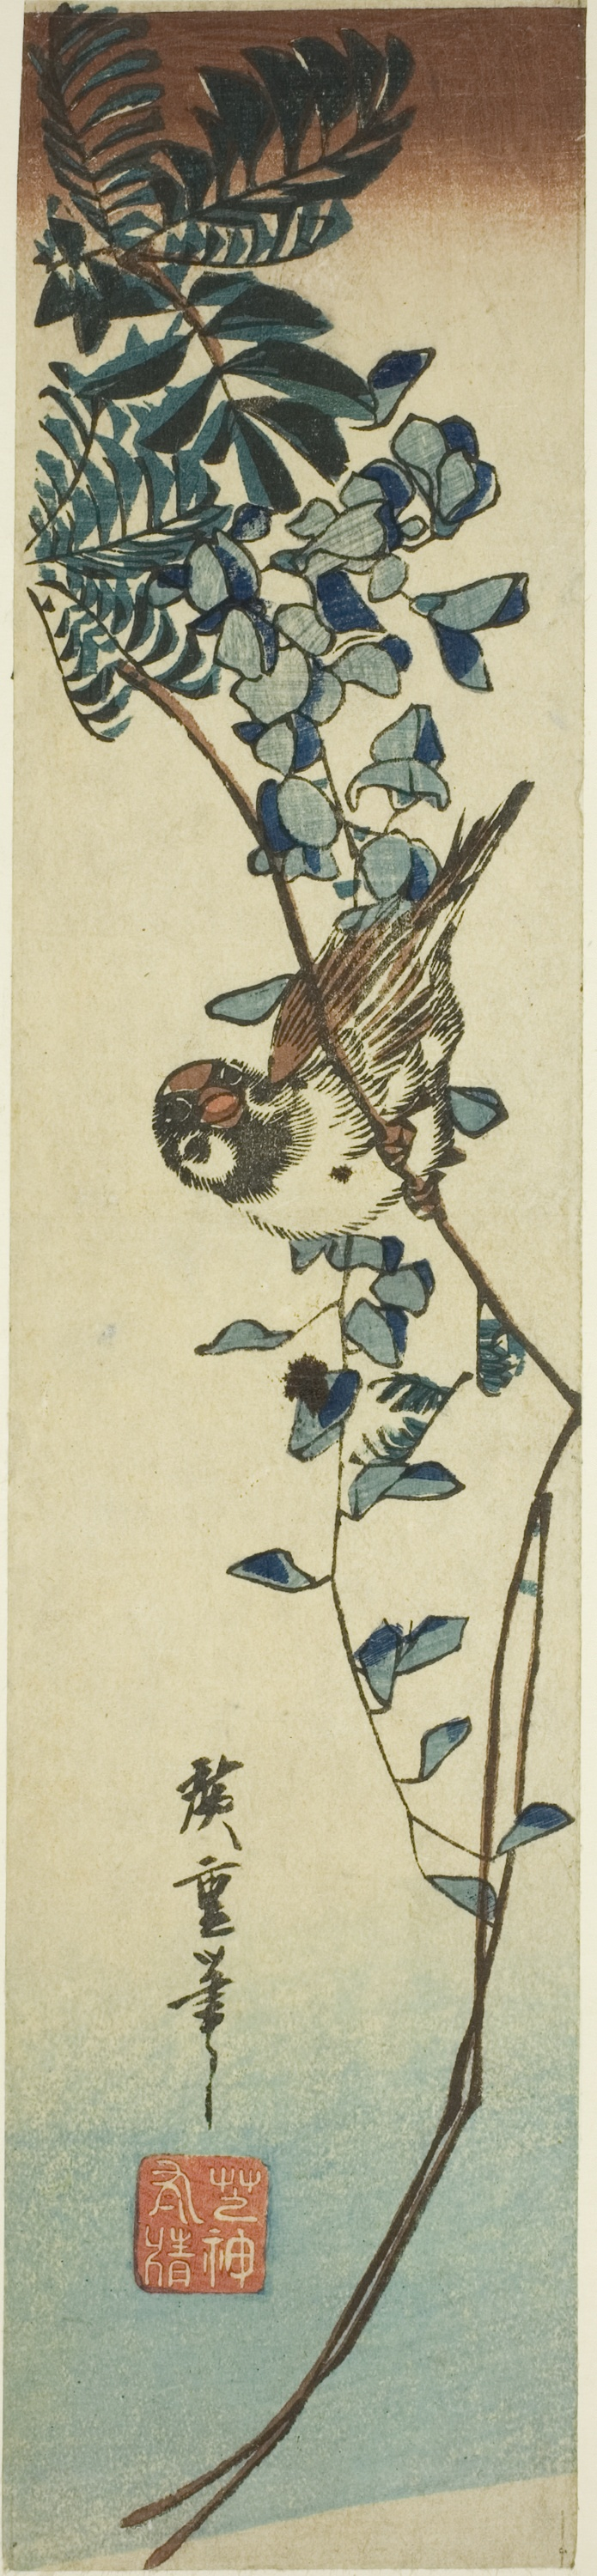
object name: Print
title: Sparrow and wisteria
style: Japanese (culture or style)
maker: Utagawa Hiroshige 歌川 広重; Japanese, 1797-1858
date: 1840s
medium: Color woodblock print; kotanzaku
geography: Japan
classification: woodblock print; print; asian art